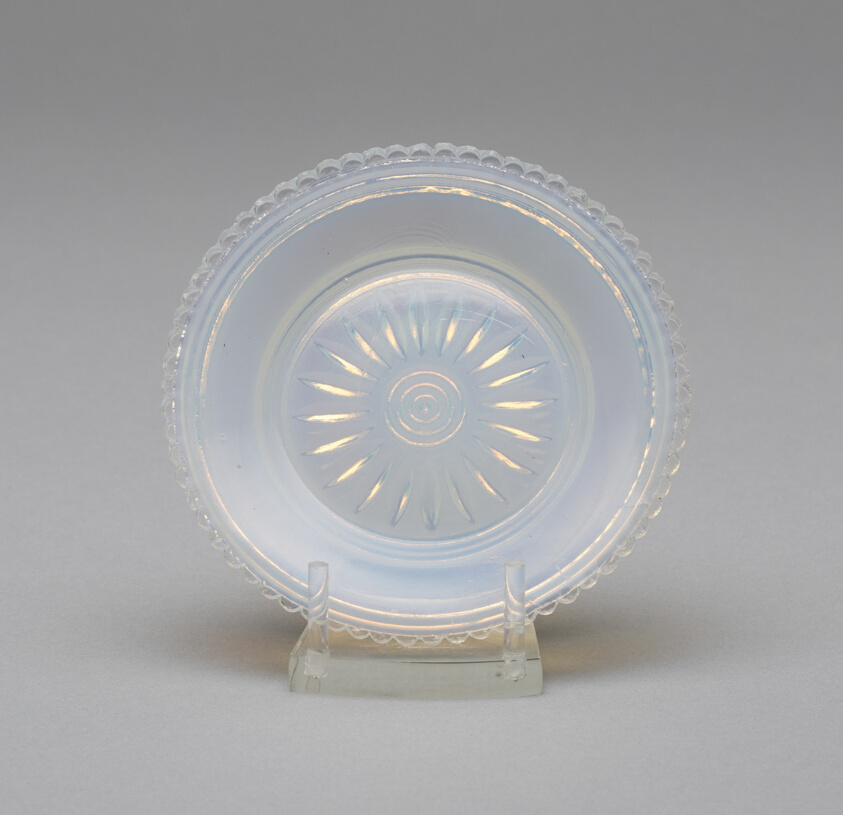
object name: Glass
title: Cup plate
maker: Artist unknown (American, 19th century); Sandwich, Massachusetts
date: 1830–40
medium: Pressed glass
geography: Sandwich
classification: plate (general, dish); glass; american decorative arts; american arts; decorative arts